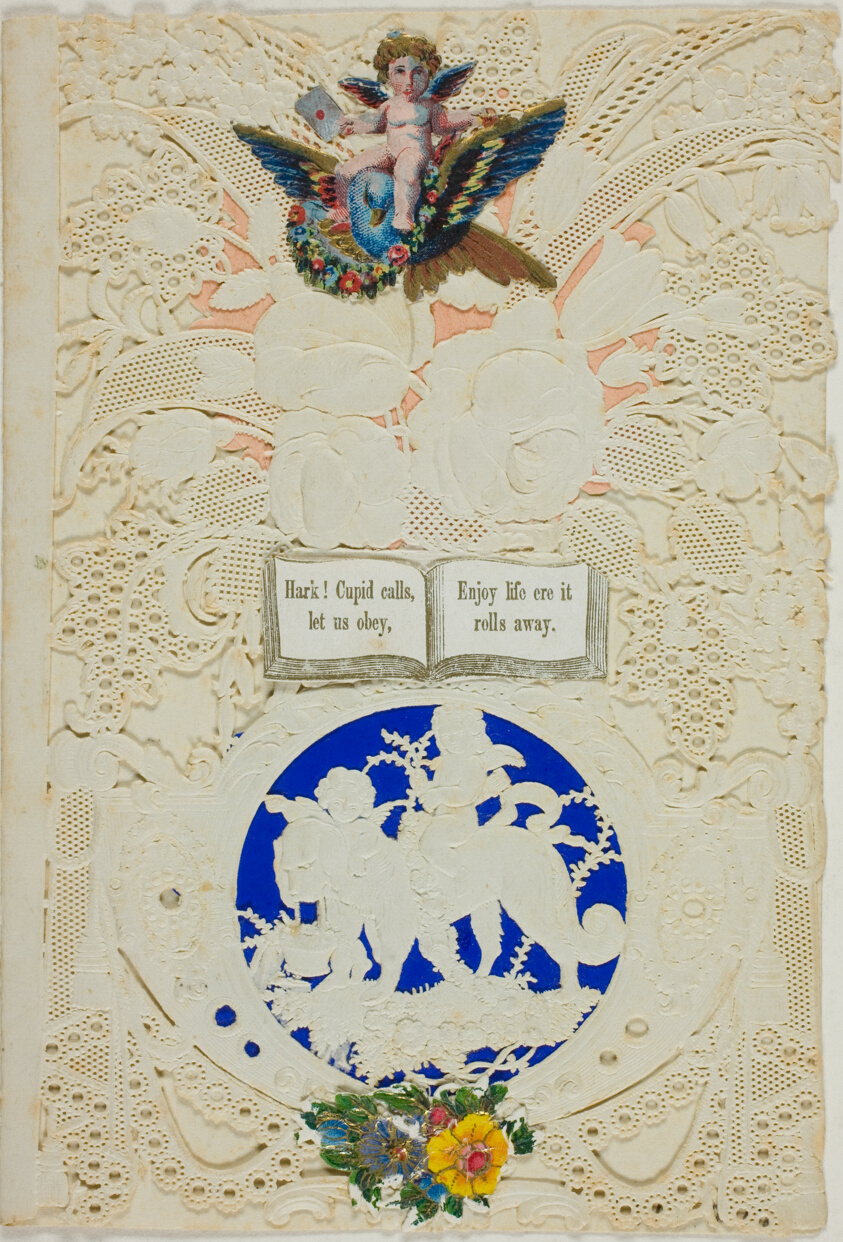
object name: Drawing and Watercolor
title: Hark, Cupid Calls (valentine)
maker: Unknown Artist; American or English, 19th century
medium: Collaged elements on cut and embossed (designed) ivory wove paper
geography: United States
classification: valentine; prints and drawing; paper